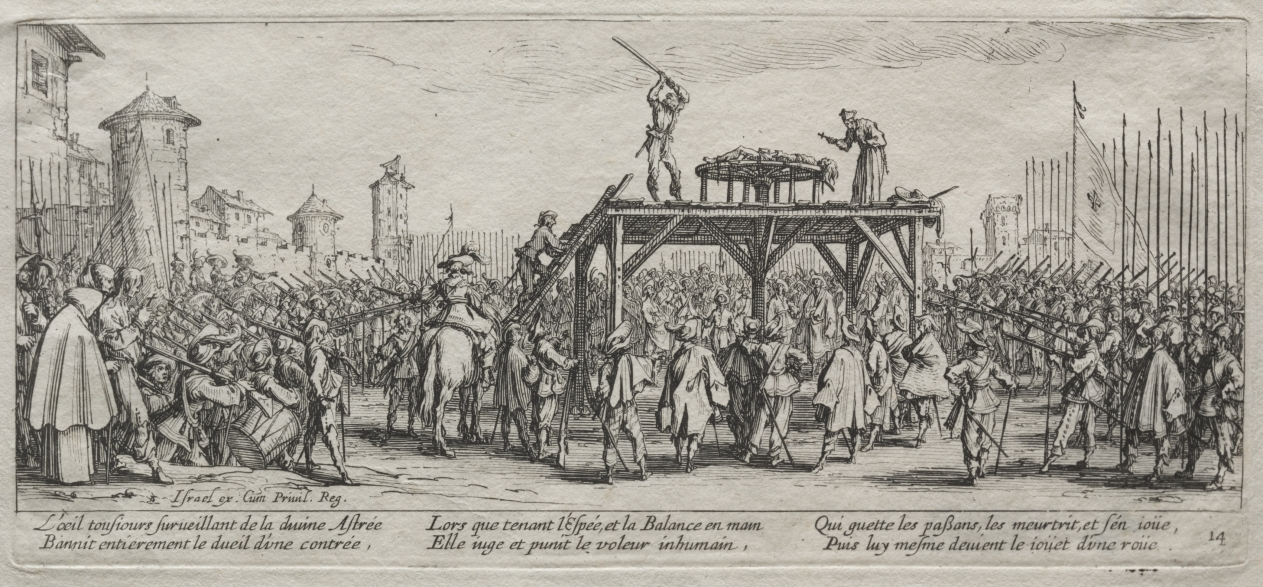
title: The Large Miseries of War: Execution on the Wheel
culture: France, 17th century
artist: Jacques Callot (French, 1592–1635)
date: 1633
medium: etching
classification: Print